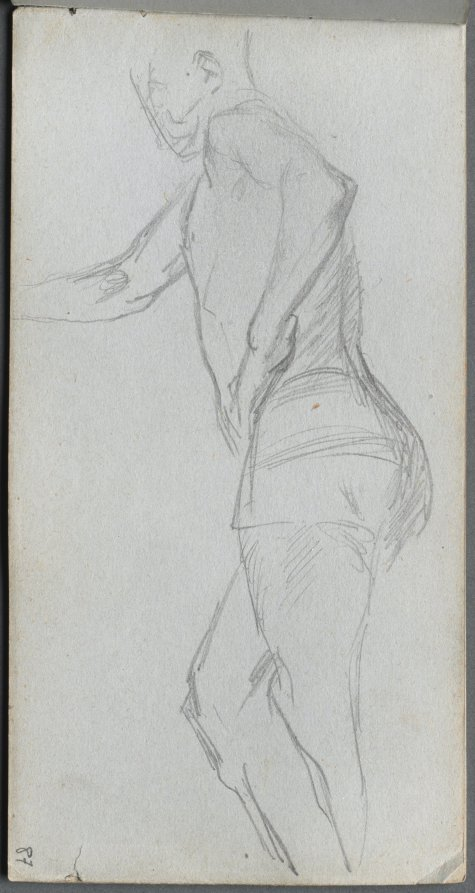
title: Sketchbook, page 87: Figure Study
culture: France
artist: Ernest Meissonier (French, 1815–1891)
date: c. 1860s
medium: graphite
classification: Bound Volume